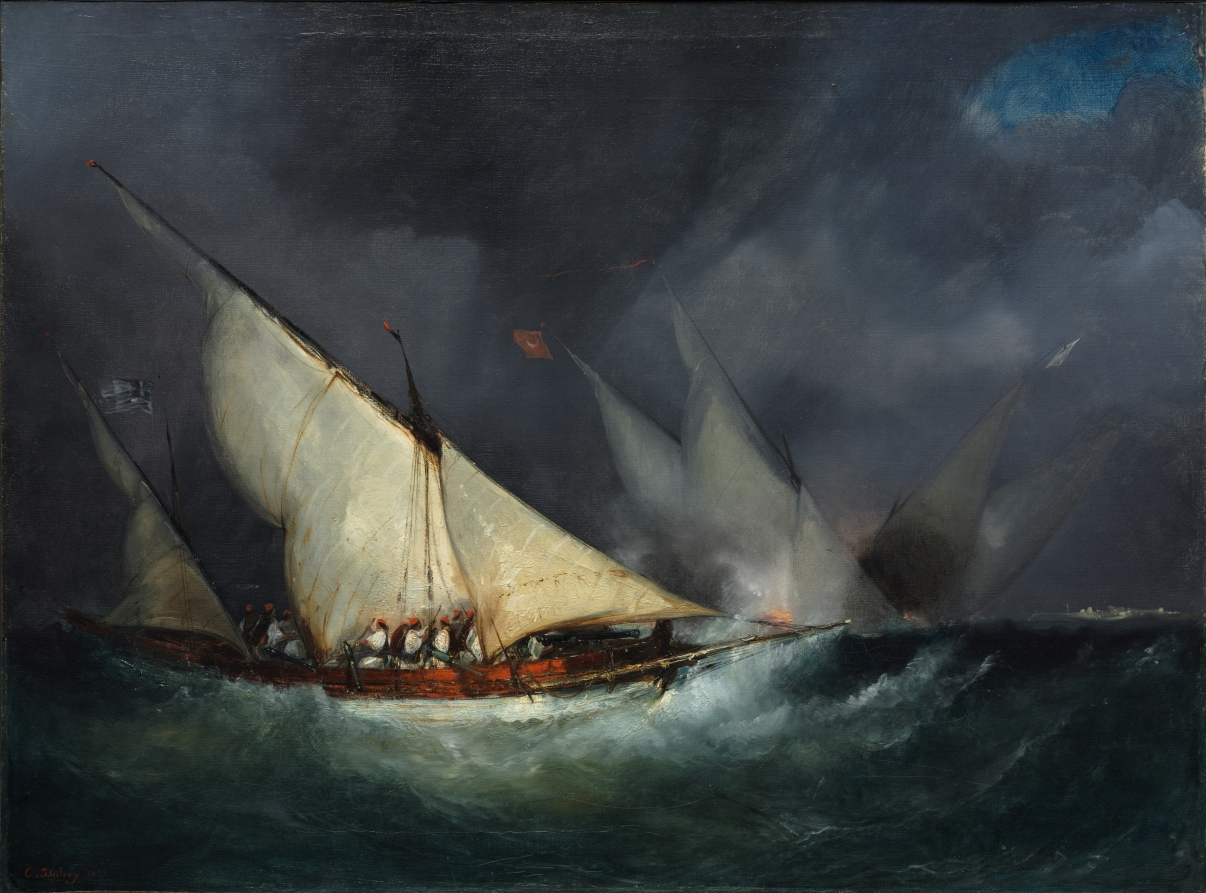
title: Greek Pirates Attacking a Turkish Vessel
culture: France, 19th century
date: not dated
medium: oil on fabric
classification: Painting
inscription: Signed lower left: E Isabey. 1827